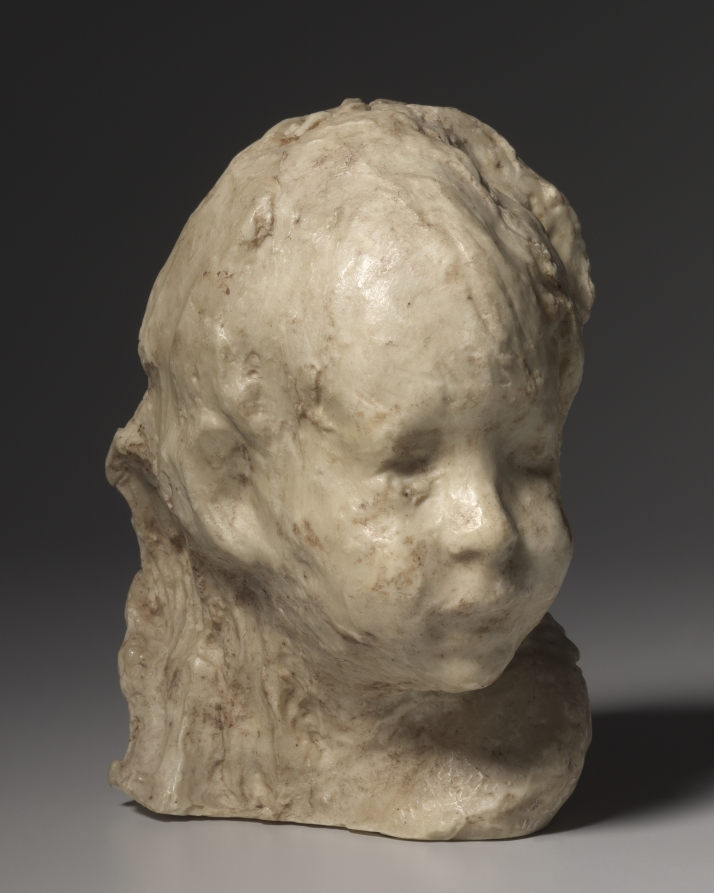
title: The Jewish Boy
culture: Italy, 19th century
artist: Medardo Rosso (Italian, 1859–1928)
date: c. 1892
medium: wax on plaster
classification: Sculpture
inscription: inscribed on left shoulder: "Bolgé/(M.?) Rosso."; inscribed inside: Danila Rosso Parravicini.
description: Medardo Rosso was a highly experimental sculptor who deliberately cultivated coarse, unrefined surfaces in his work. In this head of a boy—which the artist considered one of his most successful works—he effectively utilized the fluid properties of wax to suggest the fleeting movement of a child’s expression as well as the ephemeral nature of childhood.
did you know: Like the Impressionist painters of his time, Rosso sought to capture the fleeting and ephemeral qualities of light. However, he did not work directly from nature. His images were created from memory and emotion.